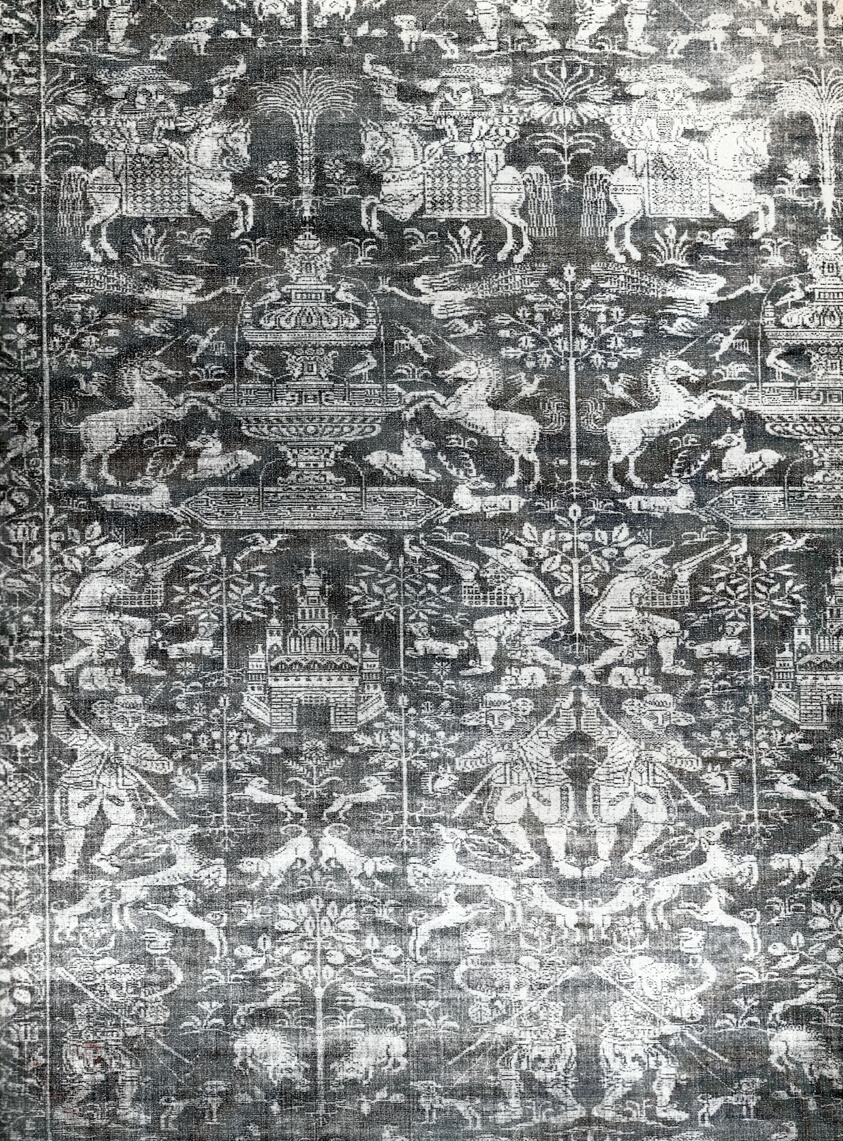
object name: Textile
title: Napkin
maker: Flanders or Netherlands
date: c. 1600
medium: Linen, satin damask weave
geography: Flanders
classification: textile; weaving